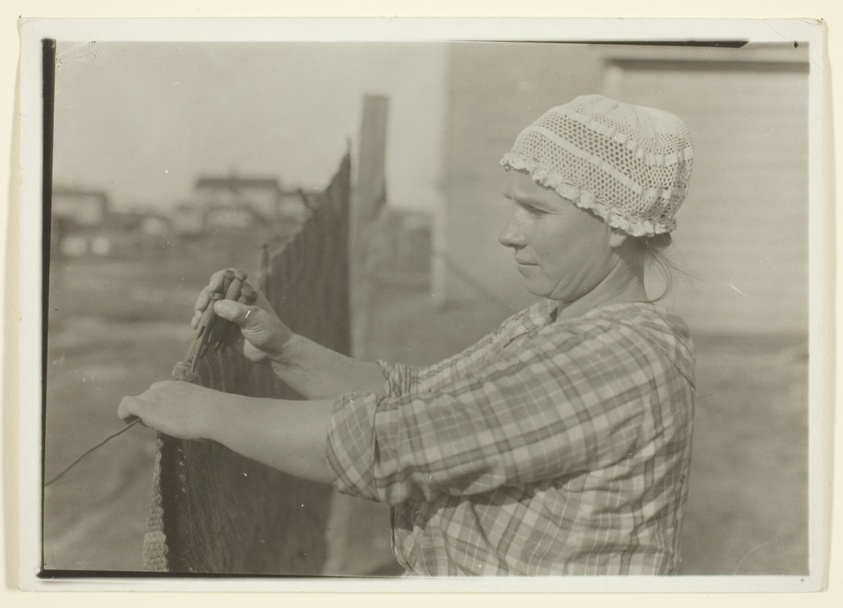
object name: Photograph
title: Slavic Miner's Wife, New Dubois, Pennsylvania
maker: Lewis Wickes Hine (American, 1874–1940)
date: 1920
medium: Gelatin silver print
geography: United States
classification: gelatin silver (developing-out-paper) pr; photographic process; photography; photograph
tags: Collected by Hugh Edwards